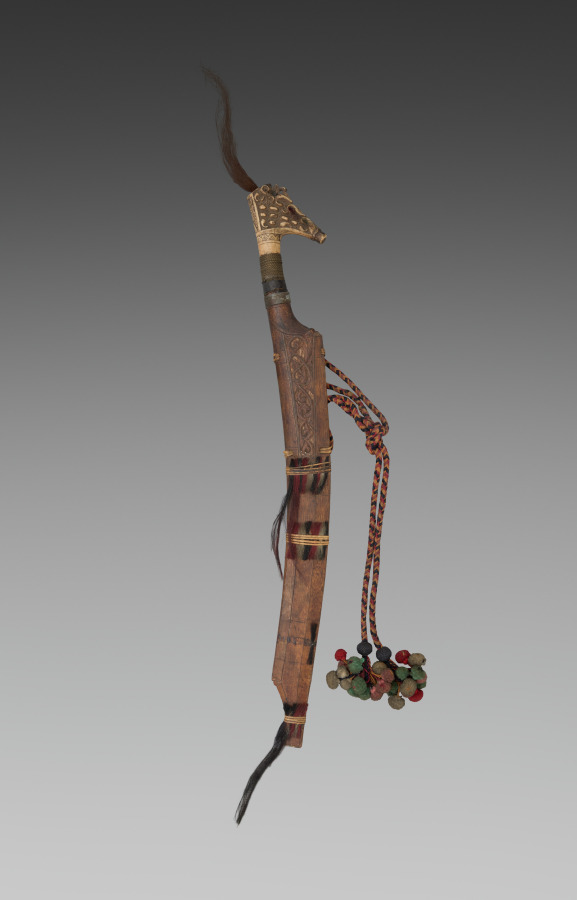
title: Knife (Mandau) and scabbard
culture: Indonesia, Borneo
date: c. 1900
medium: metal, wood, bone, hair, and braided cloth cord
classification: Arms and Armor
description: Both a work of art and a weapon, blades of this type with elaborately carved and plumed hilts were used mainly by the Dyak people of Kalimantan, on the Indonesian Island of Borneo.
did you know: Borneo is the third largest island in the world.